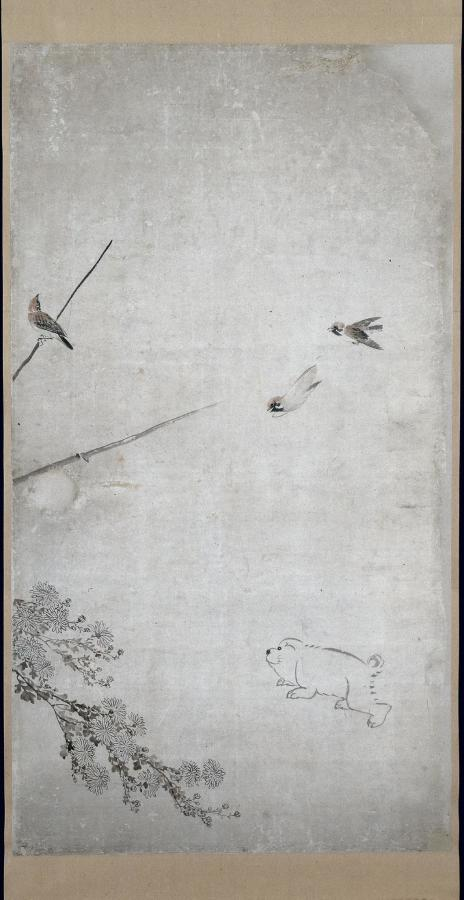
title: Puppies, Sparrows, and Chrysanthemums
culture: Japan, Edo period (1615–1868)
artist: Nagasawa Rosetsu (Japanese, 1754–1799)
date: c. 1792–94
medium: Fusuma panel remounted as a hanging scroll; ink and slight color on paper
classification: Painting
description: These paintings were originally mounted as sliding doors (fusuma) used inside a building. The circular areas on the paintings’ paper surfaces are traces of the former positions of the door pulls (hikite). A flock of sparrows gathers on a trellis supporting flowering chrysanthemum. Below is a litter of puppies, some cavorting, others napping. The tender story created by the curious puppy peering up and tilting its head to listen to the bird’s insistent call (in the leftmost part of the composition) is characteristic of Nagasawa Rosetsu’s paintings, which often use animals to illustrate the human condition.